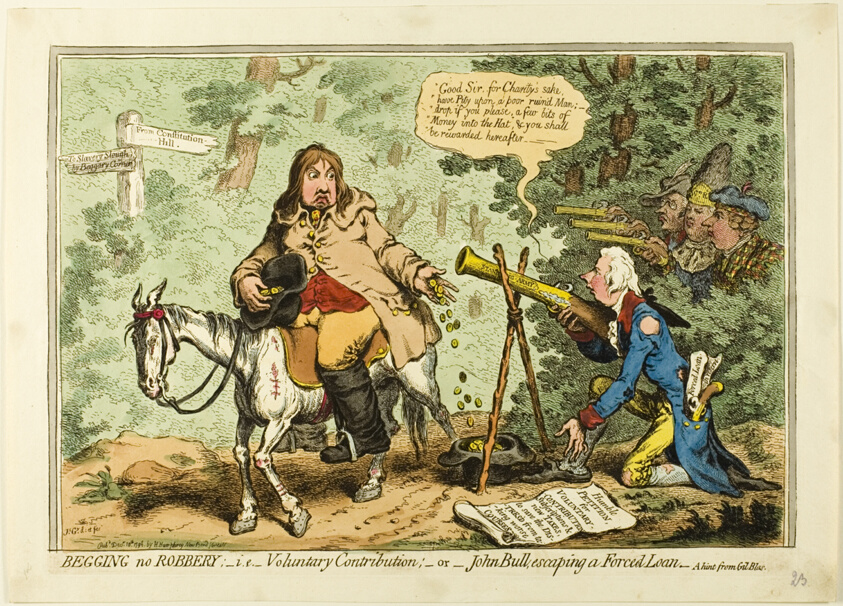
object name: Print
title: Begging no Robbery; i.e. Voluntary Contribution, or John Bull Escaping a Forced Loan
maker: James Gillray (English, 1756-1815); published by Hannah Humphrey (English, c. 1745-1818)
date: published December 10, 1796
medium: Etching in dark brown, with handcoloring, on cream wove paper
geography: England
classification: etching; print; prints and drawing